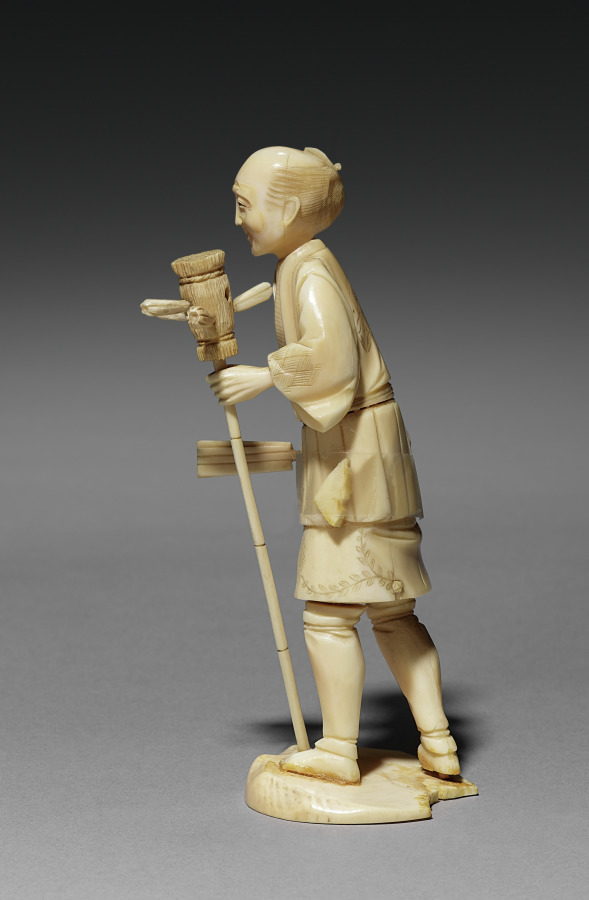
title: Man Holding a Standard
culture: Japan, Meiji period (1868–1912)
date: late 1800s-early 1900s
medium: ivory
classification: Ivory